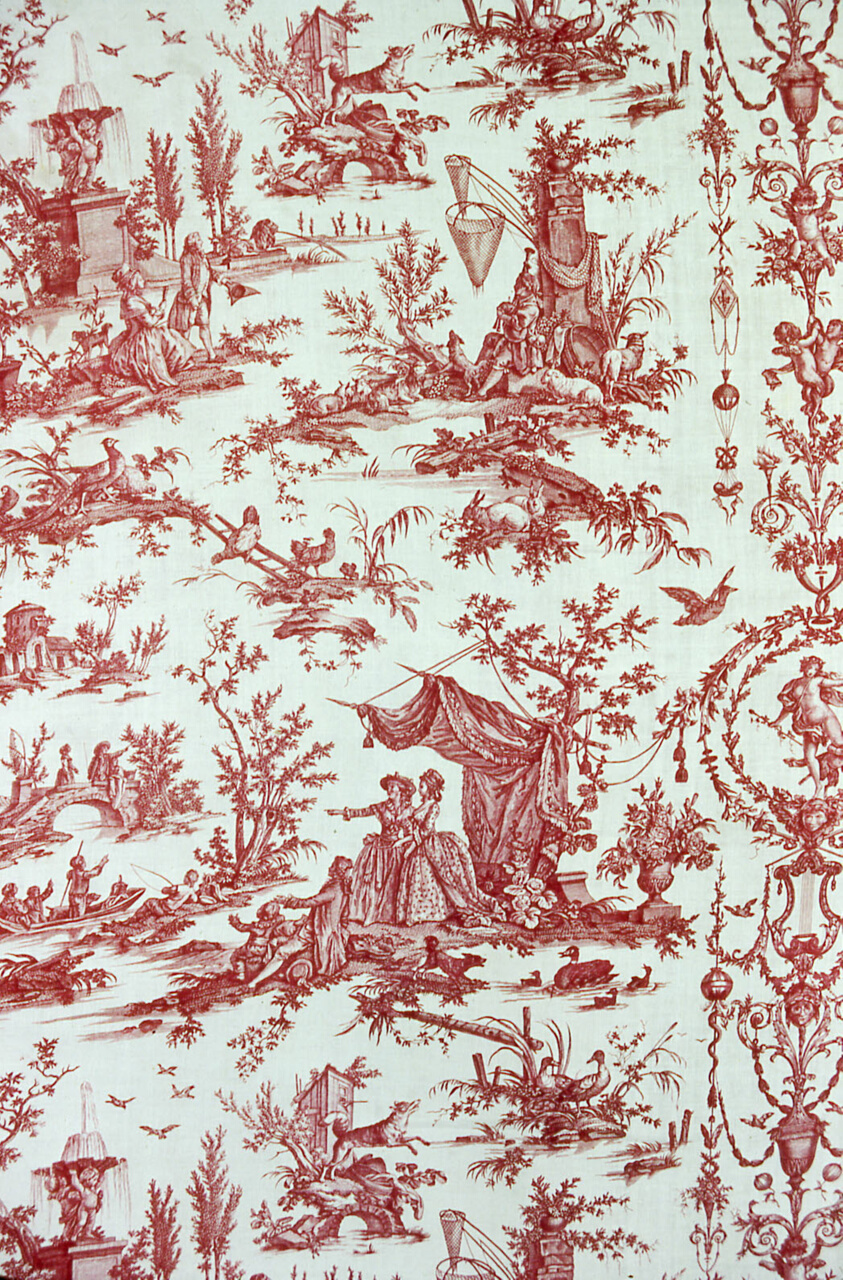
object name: Textile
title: Le Parc du Chateau (Furnishing Fabric)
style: jouy-en-Josas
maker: Designed by Jean Baptiste Huet (French, 1745–1811); Manufactured by Christophe-Philippe Oberkampf (naturalized French, 1738-1815), Oberkampf Manufactory (French, 1760-1843); Jouy-en-Josas, France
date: c. 1783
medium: Cotton, plain weave; copperplate printed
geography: Jouy-en-Josas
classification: textile; weaving - printed; furnishing textile